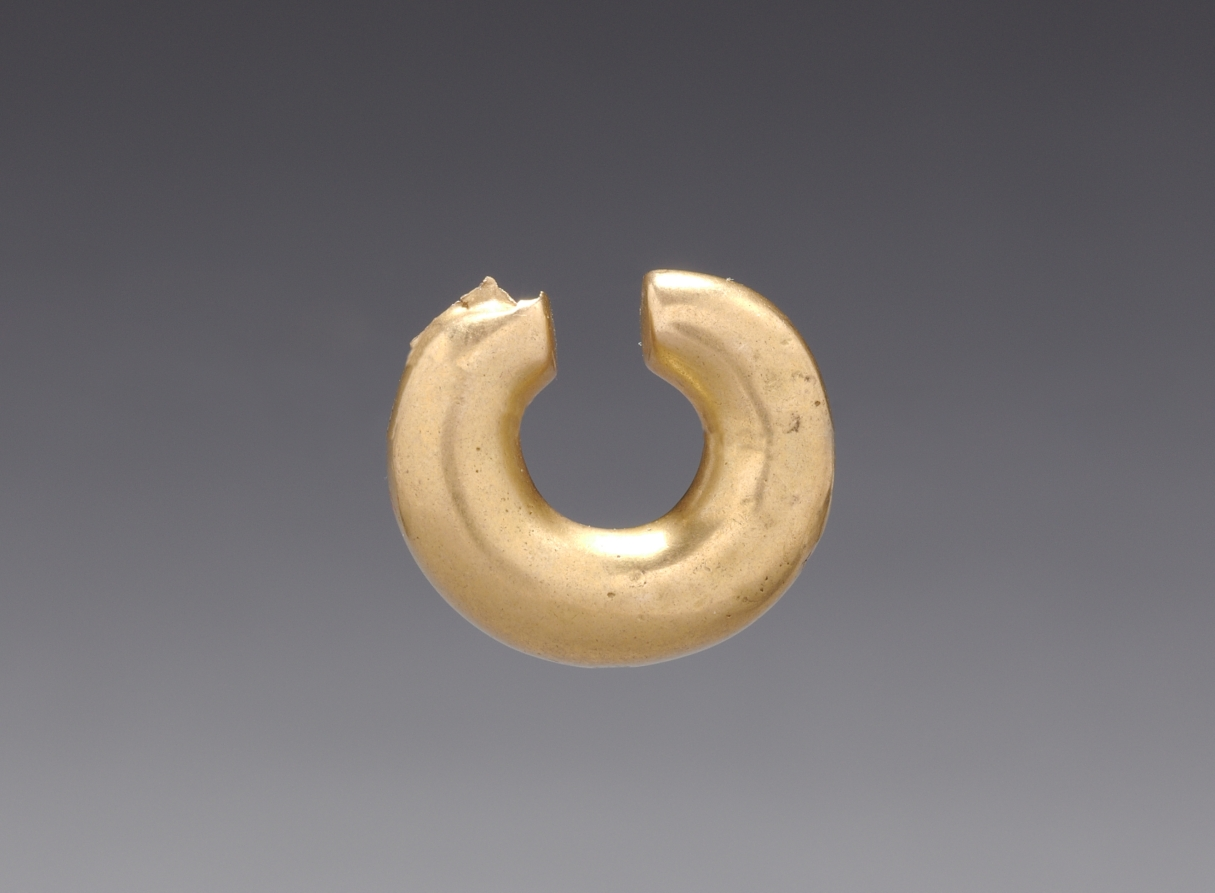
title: Nose Ring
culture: Colombia, Quimbaya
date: before 1550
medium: gold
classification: Jewelry